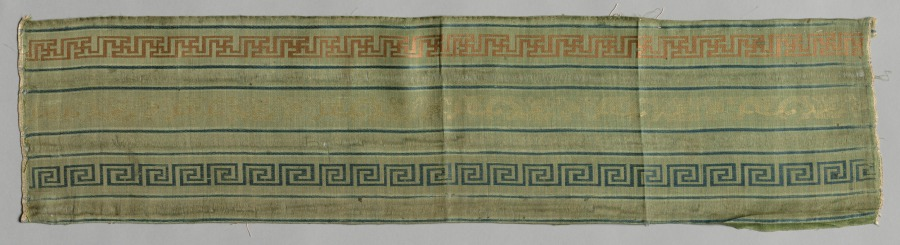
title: Border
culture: China, 19th century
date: 1800s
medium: silk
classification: Textile